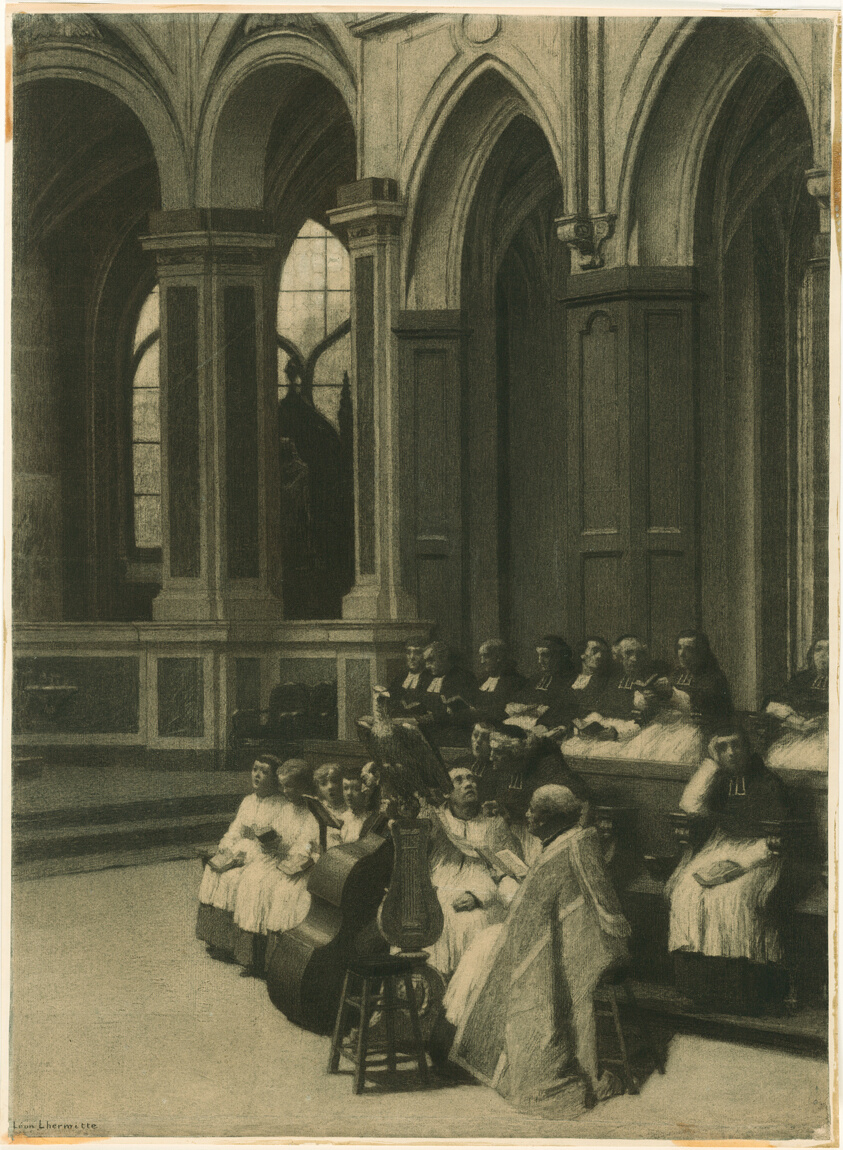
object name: Drawing and Watercolor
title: The Lectern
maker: Léon Augustin Lhermitte (French, 1844-1925)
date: 1871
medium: Black chalk with smudging, scraping and erasing with traces of white chalk on cream laid paper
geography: France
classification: chalk; drawings (visual works); prints and drawing